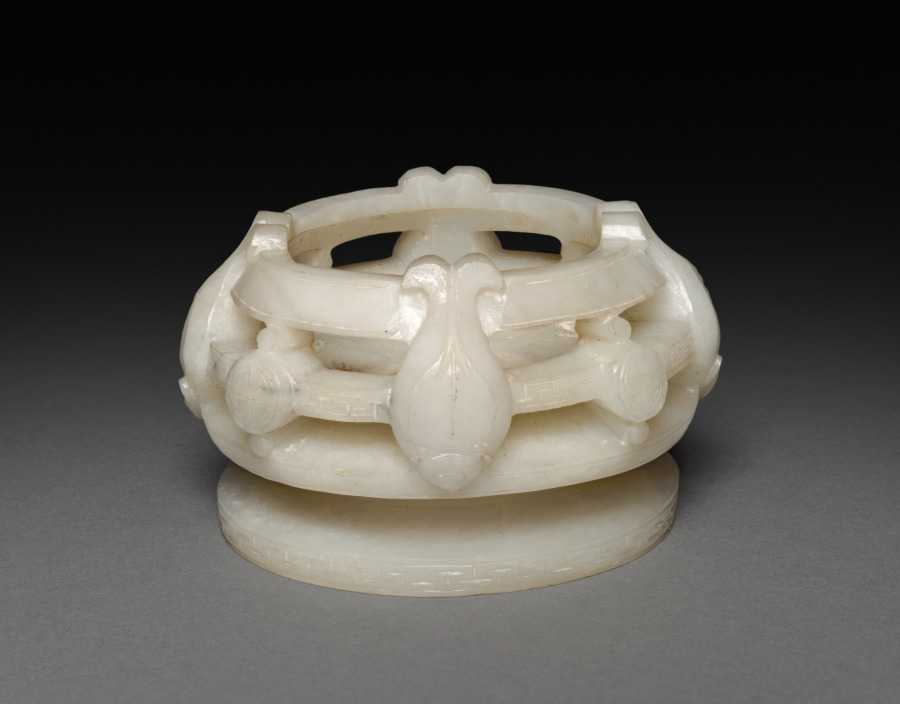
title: Three-Sectional Altar Group: Small Bowl with Carved Dragon with Lid and Base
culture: China, Qing dynasty (1644-1911)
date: 1644–1911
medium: jade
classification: Jade